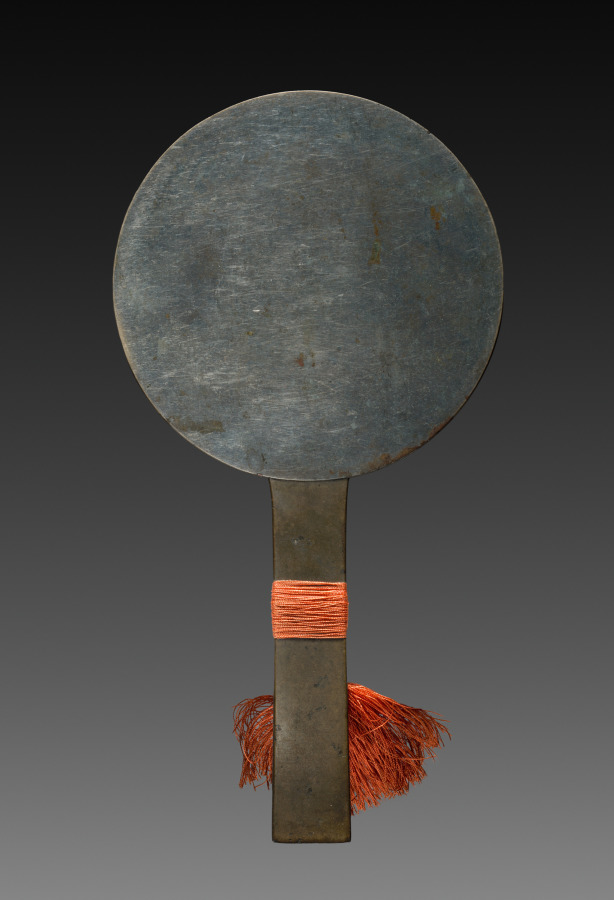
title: Mirror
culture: Japan, Edo period (1615–1868)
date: 1615–1868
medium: bronze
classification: Metalwork